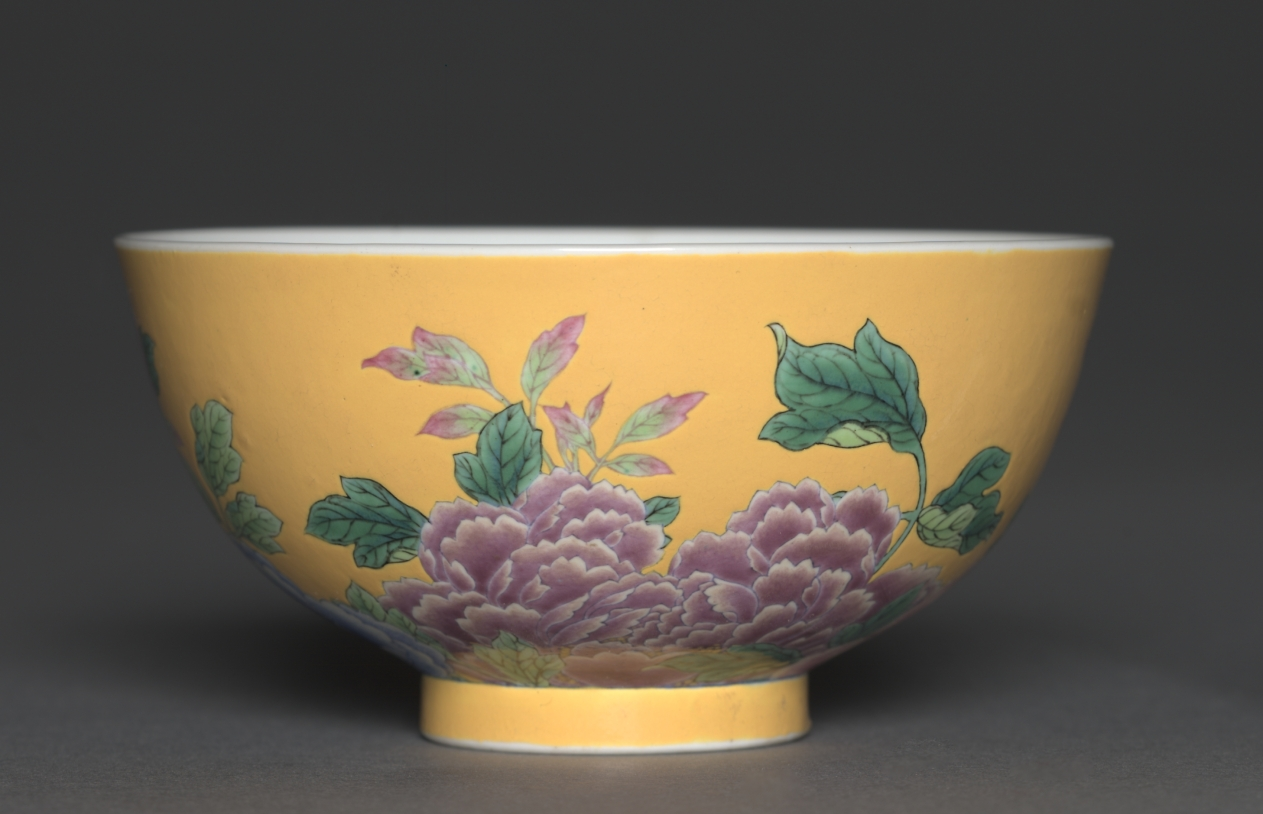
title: Bowl with Peonies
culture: China, Jiangxi province, Jingdezhen kilns, Qing dynasty (1644-1911), Kangxi mark and reign (1661-1722)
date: 1662–1722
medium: porcelain with foreign color (yangcai) overglaze enamel decoration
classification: Ceramic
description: This bowl was made at the Jingdezhen kilns and then decorated probably in the Imperial Palace workshops in Beijing.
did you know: In East Asian art, peonies traditionally symbolize prosperity and wealth.